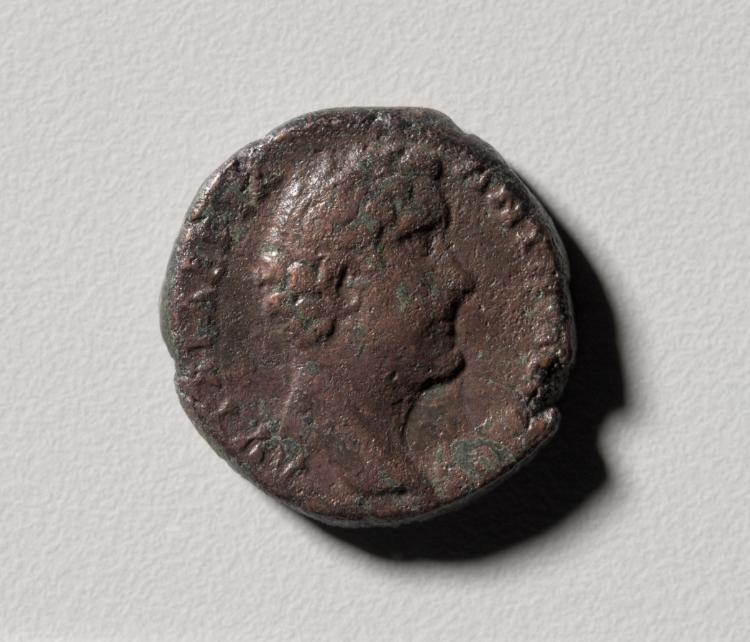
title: As: Head of Antoninus Pius, Laureate (obverse)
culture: Roman, minted at Nikopolis He Pros Istron (Moesia Inferior)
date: 138–61 CE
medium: bronze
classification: Coins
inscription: ΑV Τ ΑΙ ΑΔΡΙΑ ΑΝΤ[ΩΕΙΝΟΣ]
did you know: Antoninus Pius, shown on this coin, was Roman emperor from AD 138 to 161. He was one of the Five Good Emperors in the Nerva–Antonine dynasty and the Aurelii.